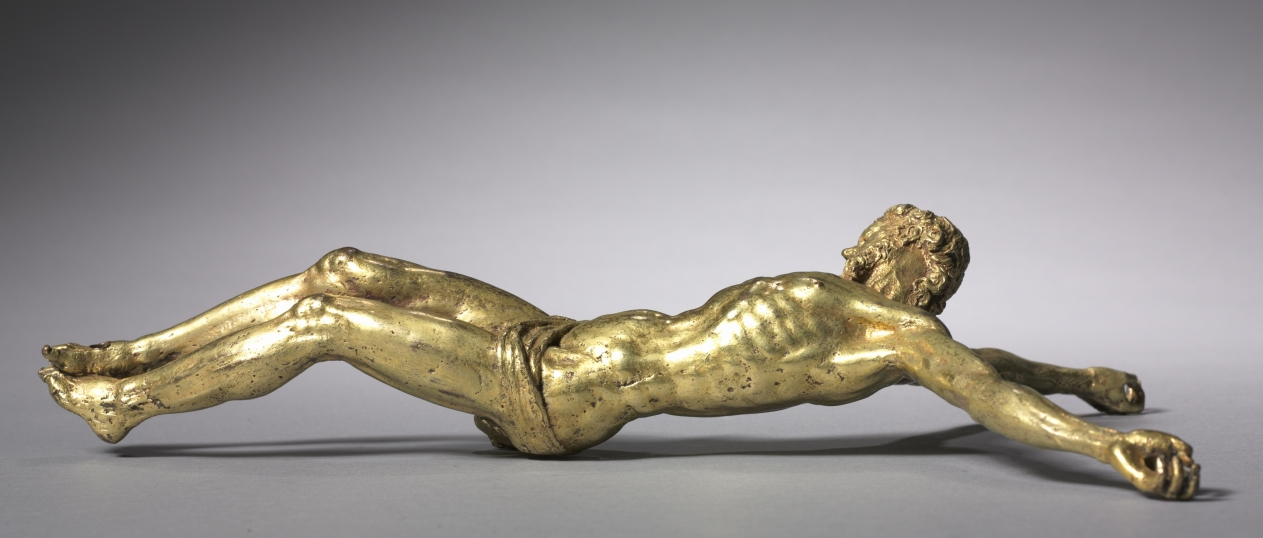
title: Crucified Christ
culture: Italy, 17th or 18th century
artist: cast after a model by Giambologna (Flemish, active Italy, 1529–1608)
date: 1600s or 1700s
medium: bronze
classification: Sculpture